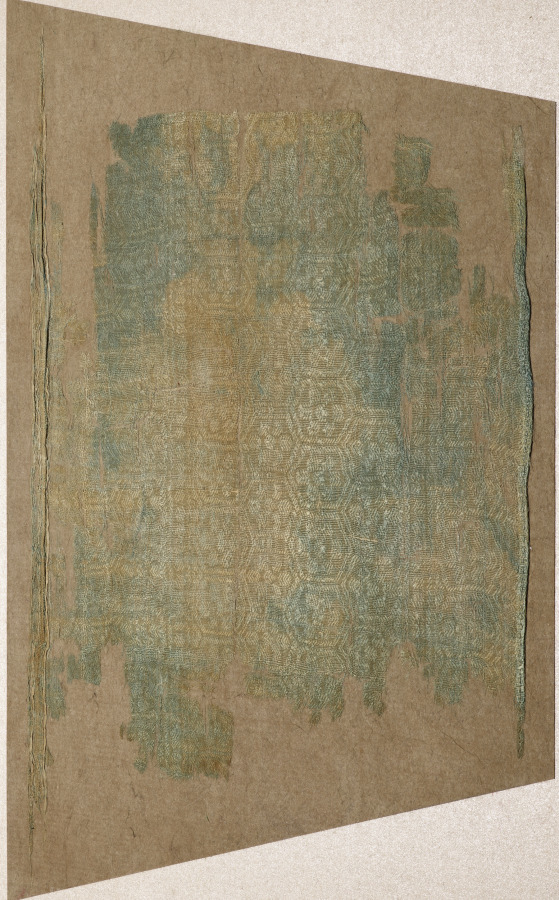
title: Fragment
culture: China, 8th century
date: 700s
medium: patterned tabby weave; silk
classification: Textile